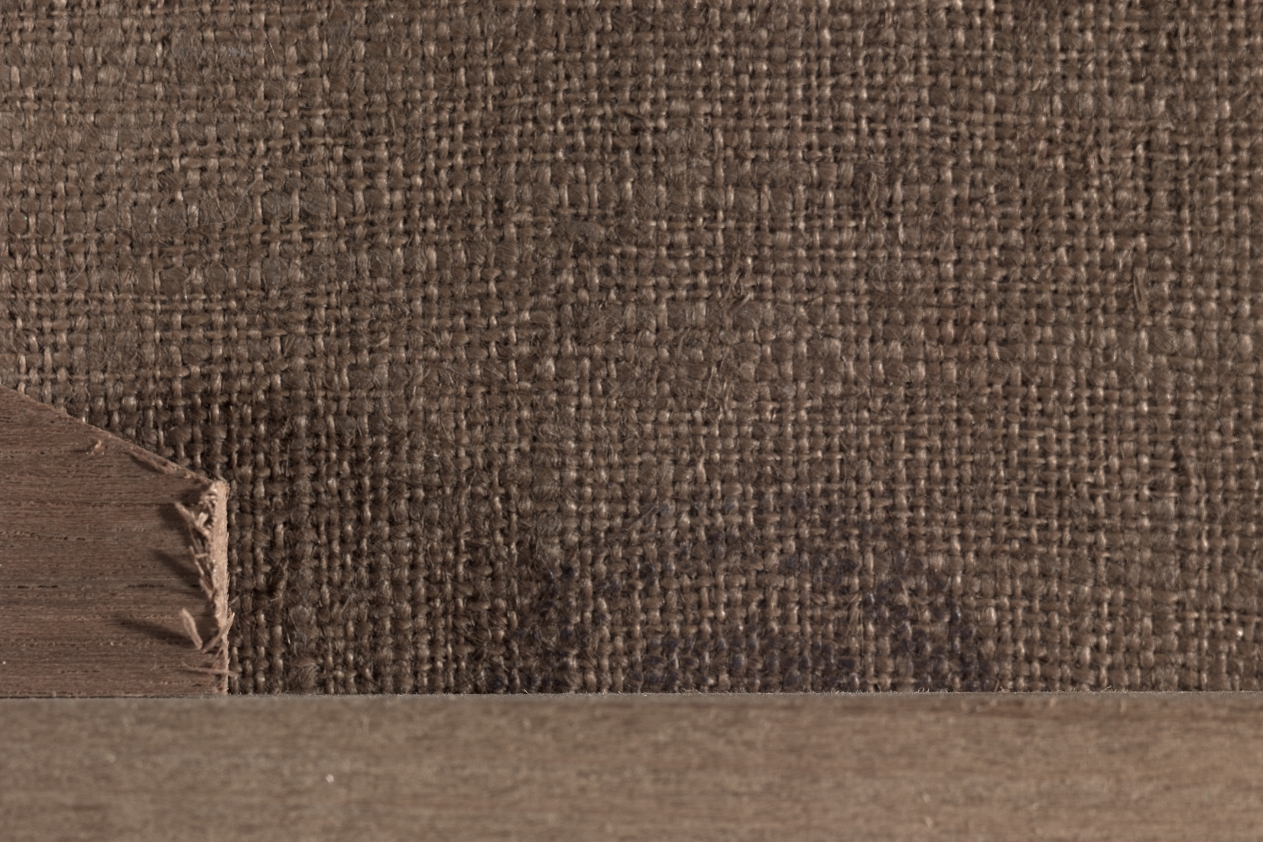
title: Tobias and the Angel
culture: Italy, 18th century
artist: Francesco Guardi (Italian, 1712–1793)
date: 1750s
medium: oil on canvas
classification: Painting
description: This series of paintings predominantly tells the Old Testament story of Abraham and Isaac, and each of the canvases treats the interaction of humans and angels. In three works, angels appear to Abraham. However, the narrative of Tobias and the Angel comes from an entirely different book of the Bible. The blind Tobit sends his son Tobias off to collect a sum of money in the distant town of Media, with the angel Raphael accompanying him in disguise as a human. This particular work depicts Raphael overseeing Tobias catching a fish, which would later be used to cure his father's blindness.